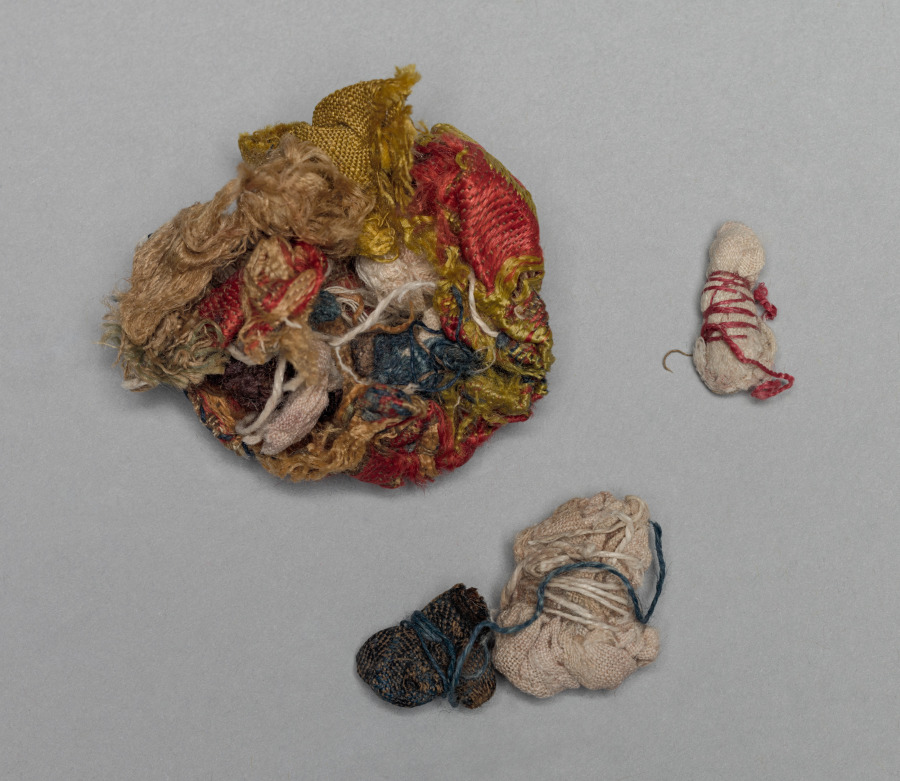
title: Relic Bundle with Saints Stephen, Sophie, Perpetua, Paul, Barnaba, Philip, Simon, Thaddeus, John the Apostle, and James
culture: Germany, Lower Saxony?, Romanesque period, 11th century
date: c. 1045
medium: Compound weave or samite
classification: Metalwork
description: These relics are housed in the portable altar commissioned by Countess Gertrude of Brunswick, one of the Guelph Treasure’s earliest and most sumptuous objects.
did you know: An x-ray revealed only small specks of solid material among this wrapped bundle.